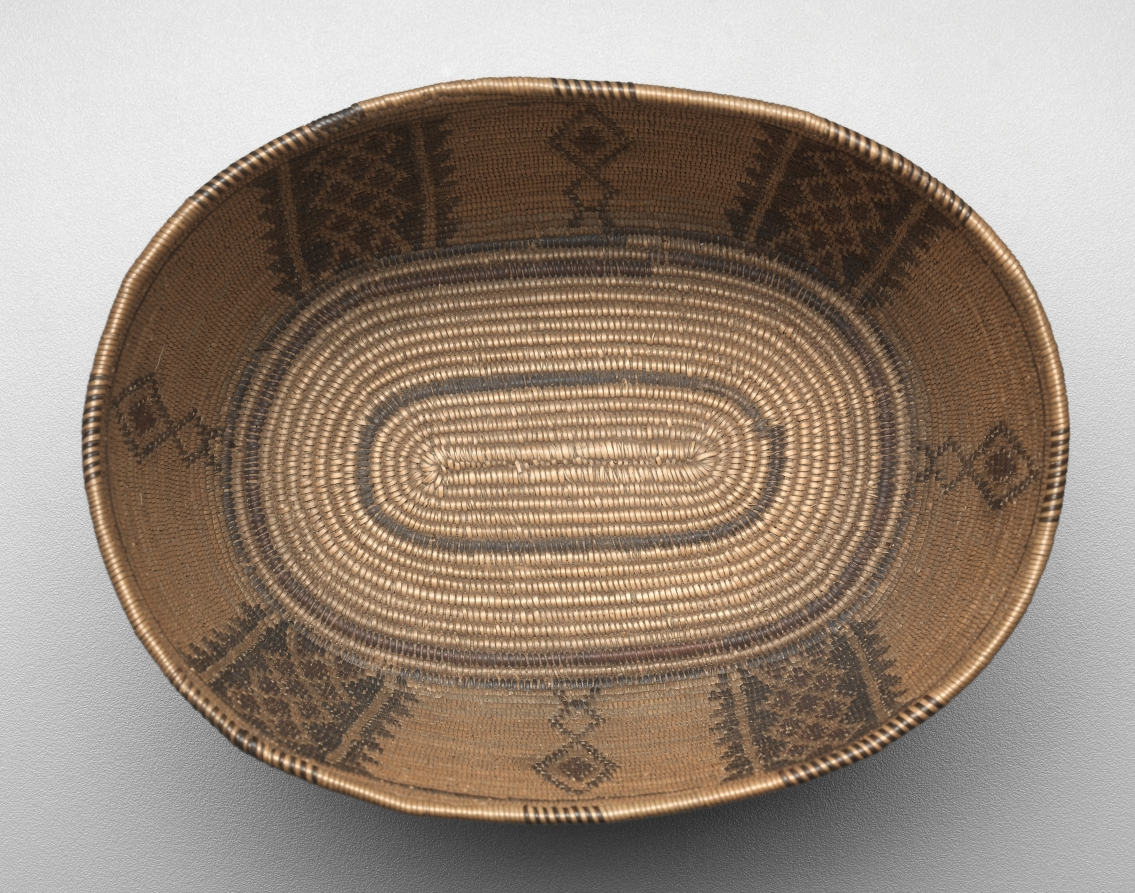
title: Bowl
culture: Great Basin, Timbisha Shoshone (Panamint)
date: c 1900–1910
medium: willow, devil's claw, yucca root; coiled (3 rods)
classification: Basketry